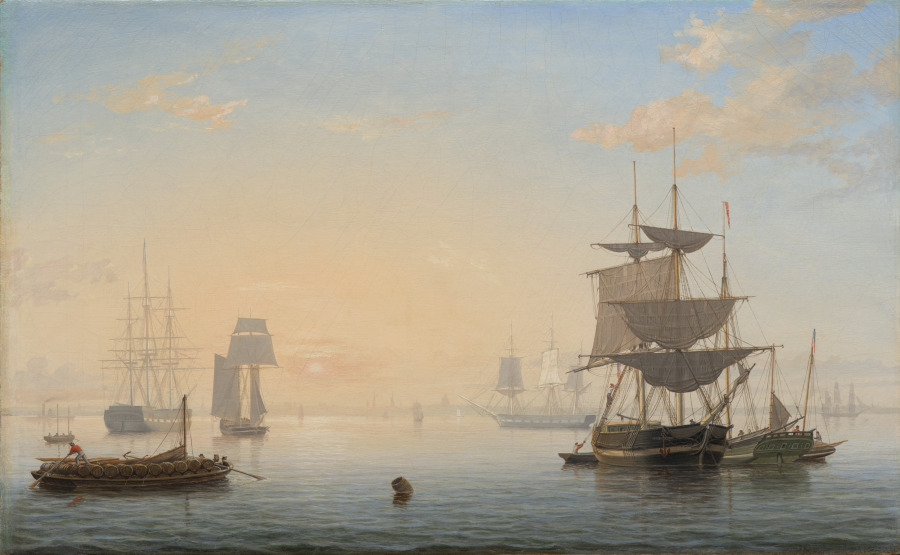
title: Harbor of Boston, with the City in the Distance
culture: America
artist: Fitz Henry Lane (American, 1804–1865)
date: c. 1846–1847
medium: oil on canvas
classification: Painting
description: In this late afternoon view of Boston Harbor, Lane masterfully evoked the diffuse quality of sunlight reflecting off water. The artist was a son of a shipbuilder, so perhaps it is not surprising that his renderings of ships and their intricate riggings are painstakingly accurate. On the far left side of the painting, evolving technology appears in the guise of a steamboat, which ferried passengers between Boston and Gloucester.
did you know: For a long time, art historians mistakenly thought the artist’s middle name was Hugh.